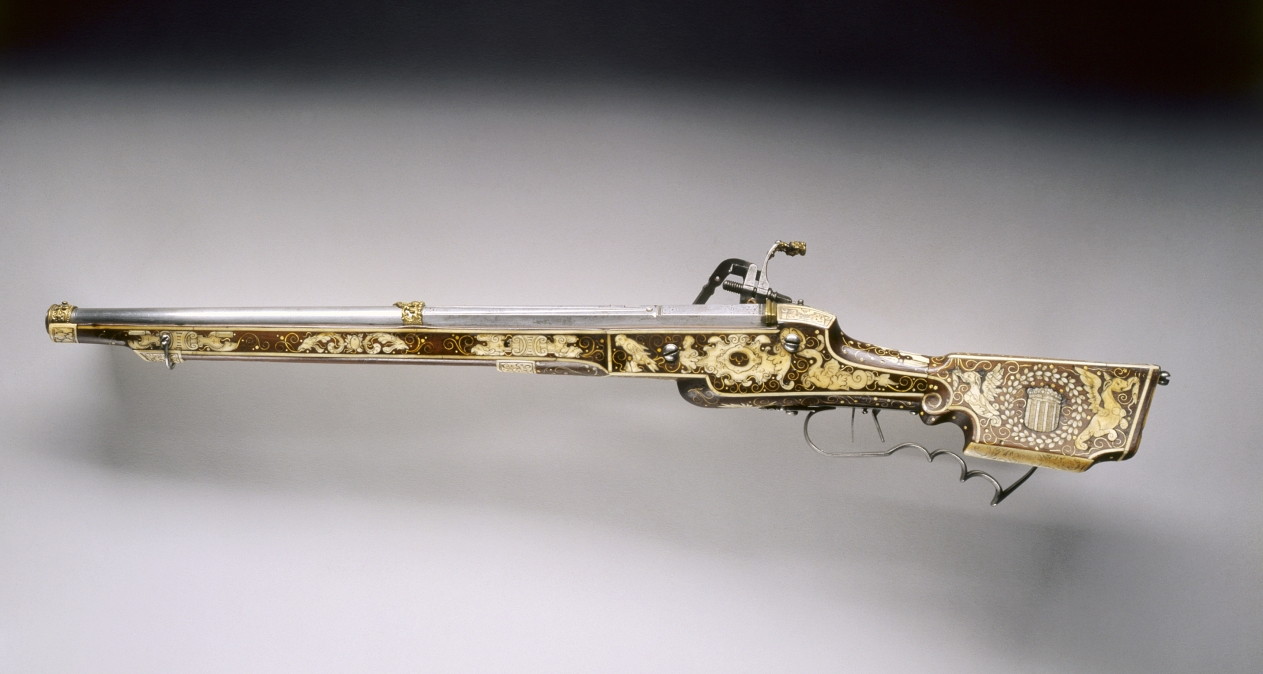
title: Wheel-Lock Rifle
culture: Germany, Bavaria (?), 17th century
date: 1618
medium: steel, brass, walnut stock inlaid with bone, horn and ivory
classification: Arms and Armor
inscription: on barrel: 1618, S.H.; on stock: FF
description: Made originally as a petronel pistol, this firearm seems to have been refitted with a new stock sometime during the 17th century to convert it into a rifle, most likely for a child's use.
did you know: The artisan who made this rifle used brass, bone, horn, and ivory to create decorative elements like animals involved in the hunt, fruits, and other details. If you look beneath the gun, you will see a goose or duck and a vase of flowers near the trigger.